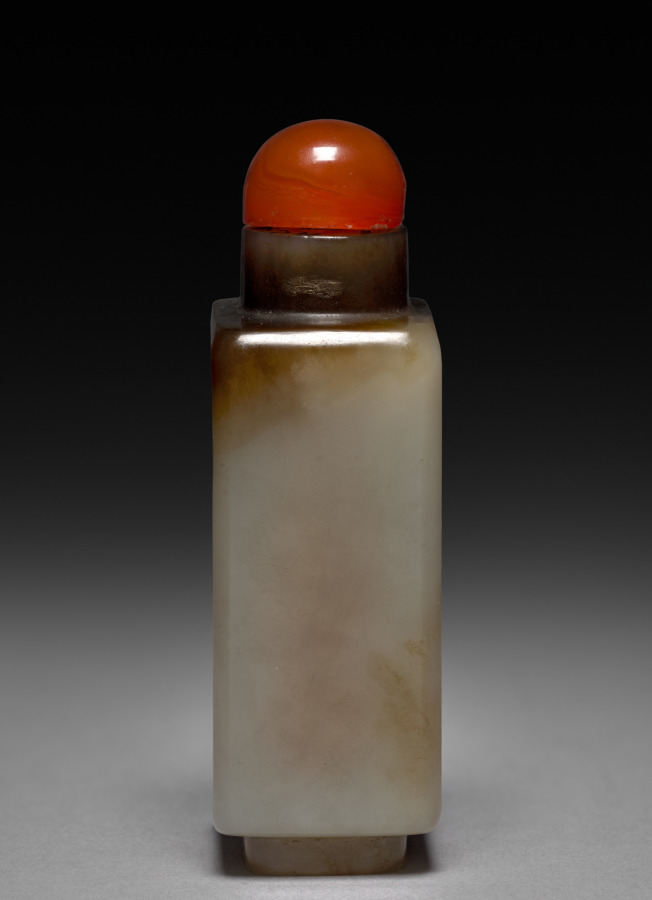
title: Snuff Bottle with Stopper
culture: China, Qing dynasty (1644–1911), Qianlong reign (1736–95)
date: 1736–95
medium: jade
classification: Jade